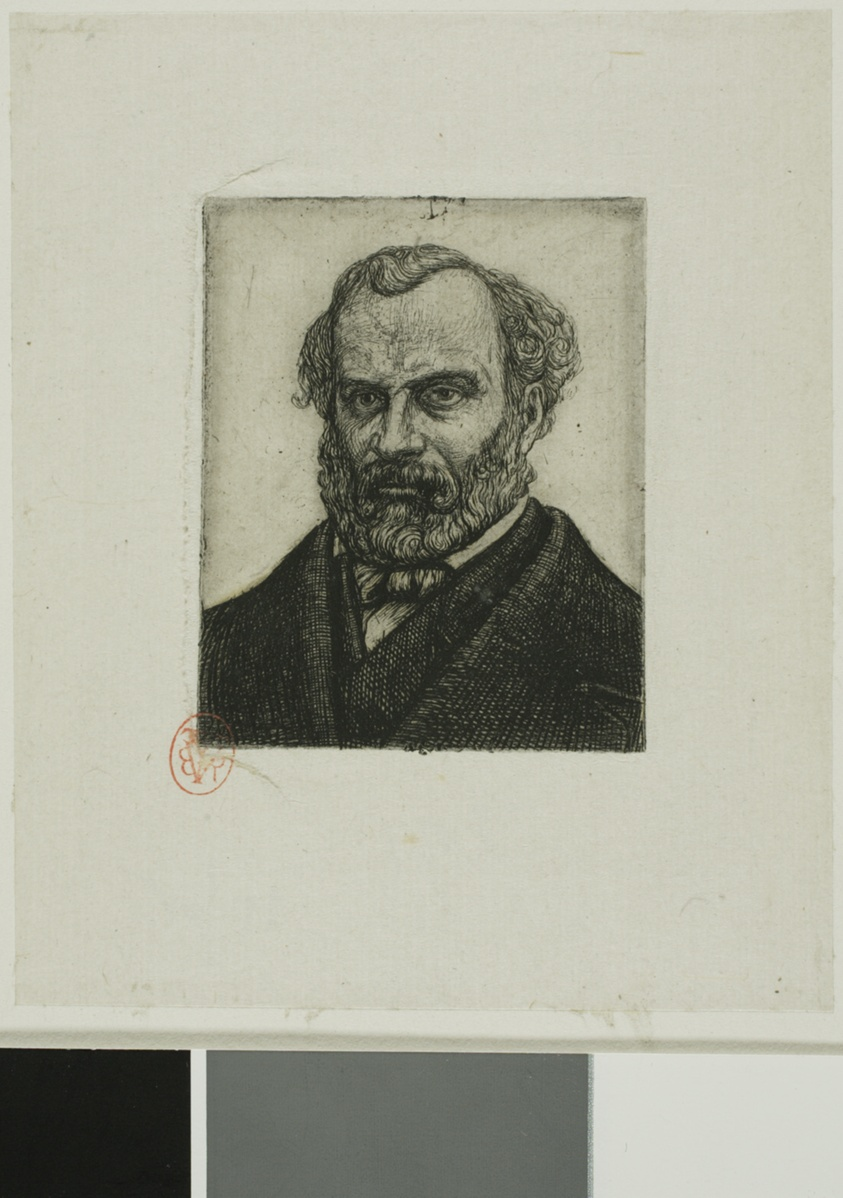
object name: Print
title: Portrait of Armand Guéraud of Nantes, Printer and Man of Letters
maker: Charles Meryon (French, 1821-1868)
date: 1861–62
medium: Etching, from a tin plate, on grayish ivory laid chine, laid down on ivory card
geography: France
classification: etching; print; prints and drawing